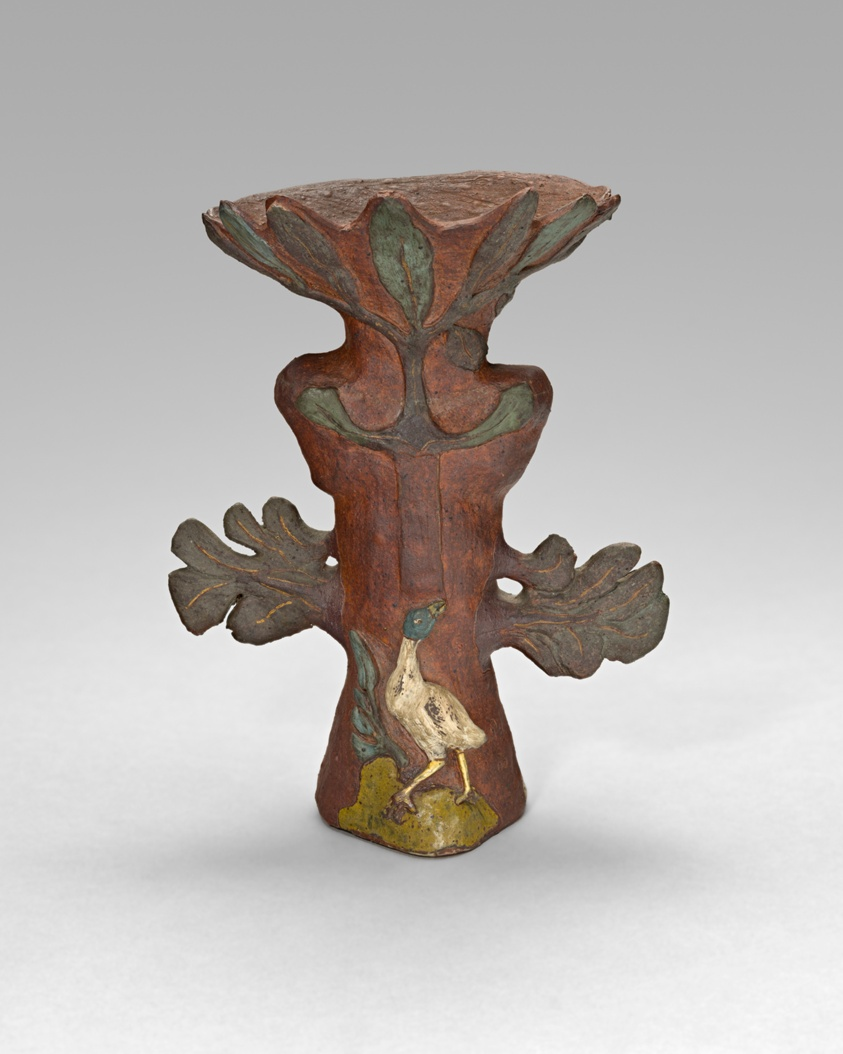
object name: Sculpture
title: Vase in the Form of a Tropical Plant with Bird and Deity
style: Post-Impressionism, 19th century, nineteenth century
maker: Paul Gauguin (French, 1848–1903)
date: 1887/88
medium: Stoneware painted with slip and gold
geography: France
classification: vase; sculpture; french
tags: vase, bird, diety, gods (deities), plants, sculpture